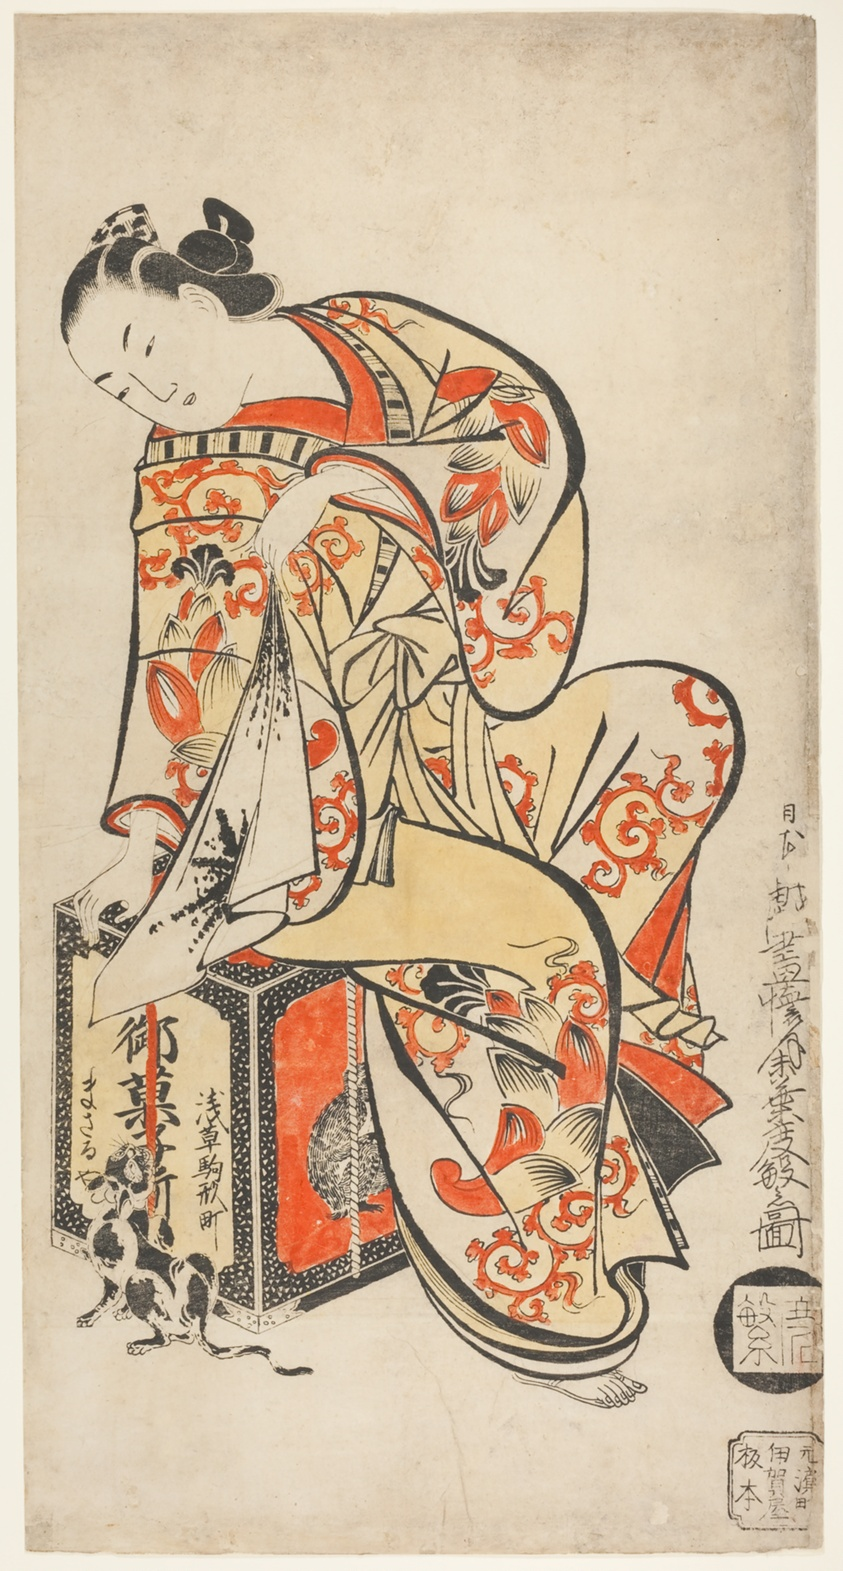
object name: Print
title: Courtesan Playing with a Cat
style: Japanese (culture or style)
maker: Kaigetsudo Dohan (Japanese, active c. 1704-16)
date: c. 1715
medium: Hand-colored woodblock print; tan-e, vertical o-oban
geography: Japan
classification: woodblock print; print; asian art